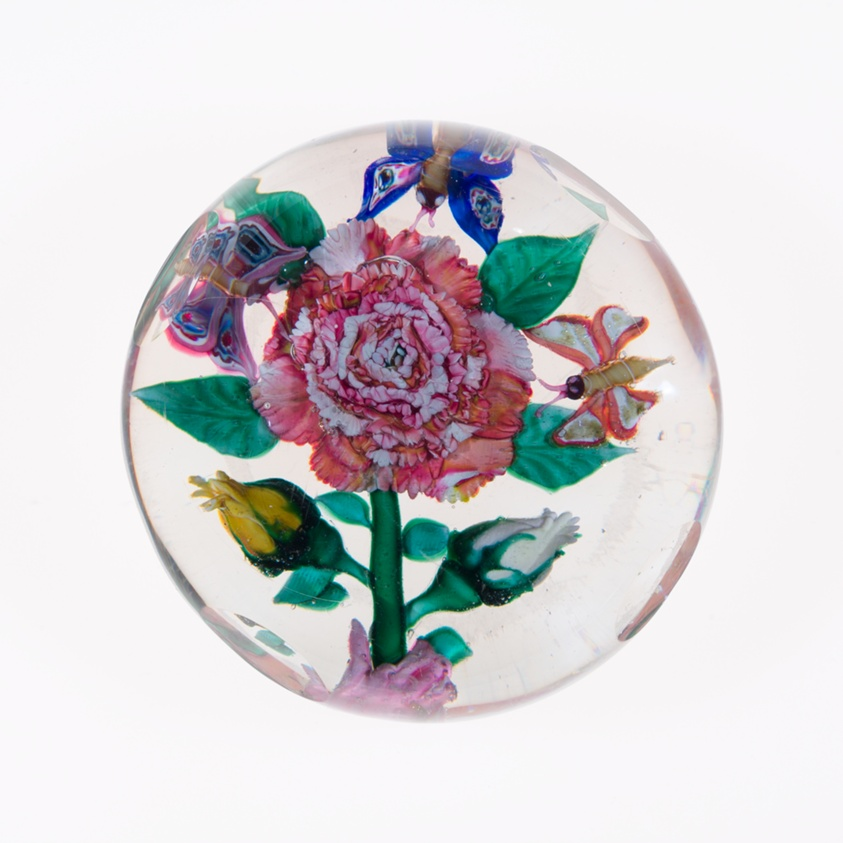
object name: Glass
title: Paperweight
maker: Mount Washington Glass Co.; American, 1837-1900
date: Late 19th century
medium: Glass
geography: United States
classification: paperweight; glass